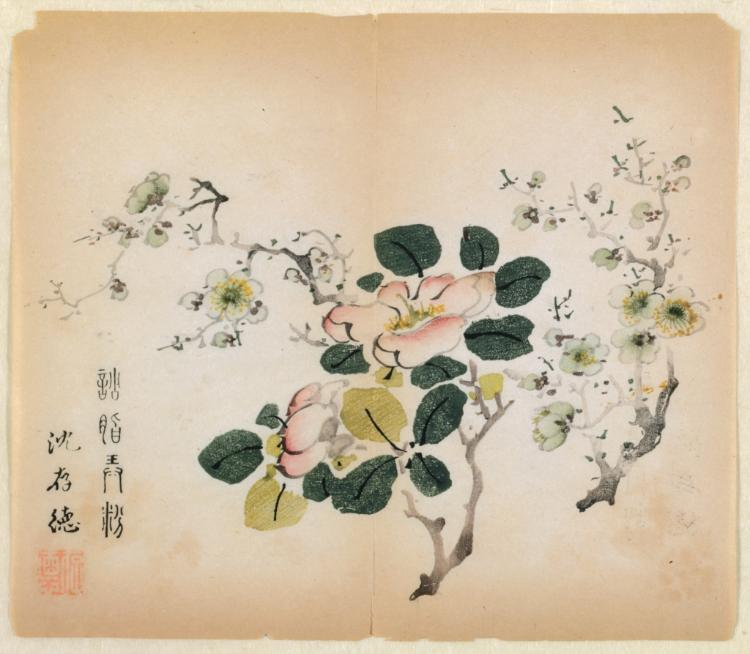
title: Flowering Prunus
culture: China, Ming dynasty (1368-1644) or later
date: 1368–1644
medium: color woodblock print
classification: Print